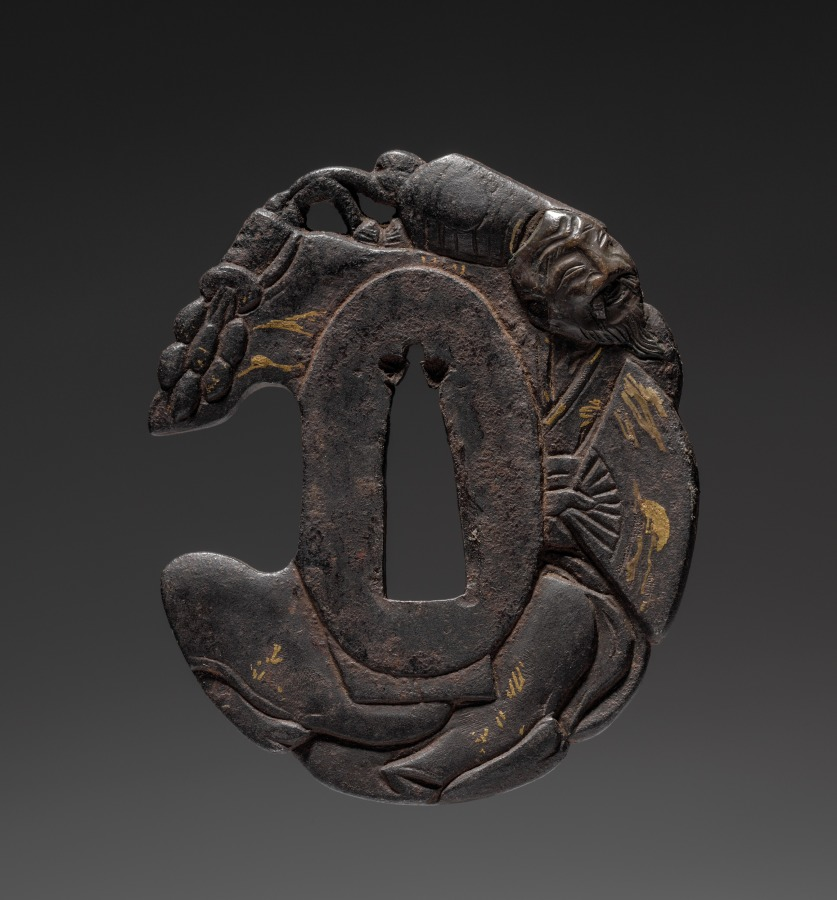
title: Sword Guard (Tsuba)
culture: Japan, possibly Edo period (1615-1868)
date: c. 1615–1868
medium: iron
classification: Arms and Armor